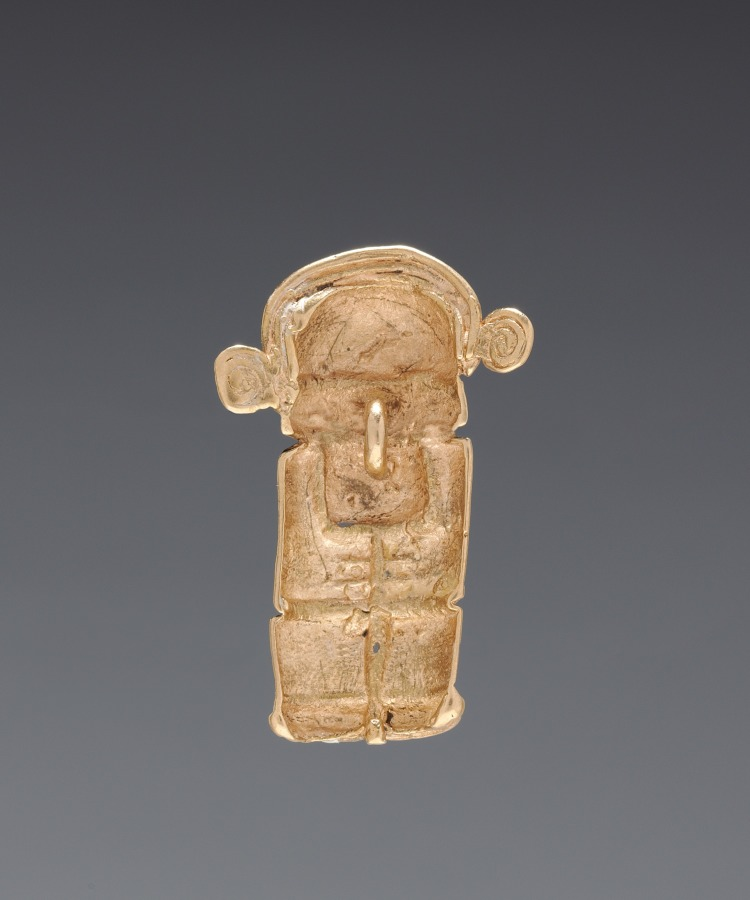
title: Necklace Figurine Bead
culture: Colombia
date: 1–700 CE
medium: cast gold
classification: Jewelry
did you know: Working with gold dates back to at least 500 BC in Ecuador and Colombia.